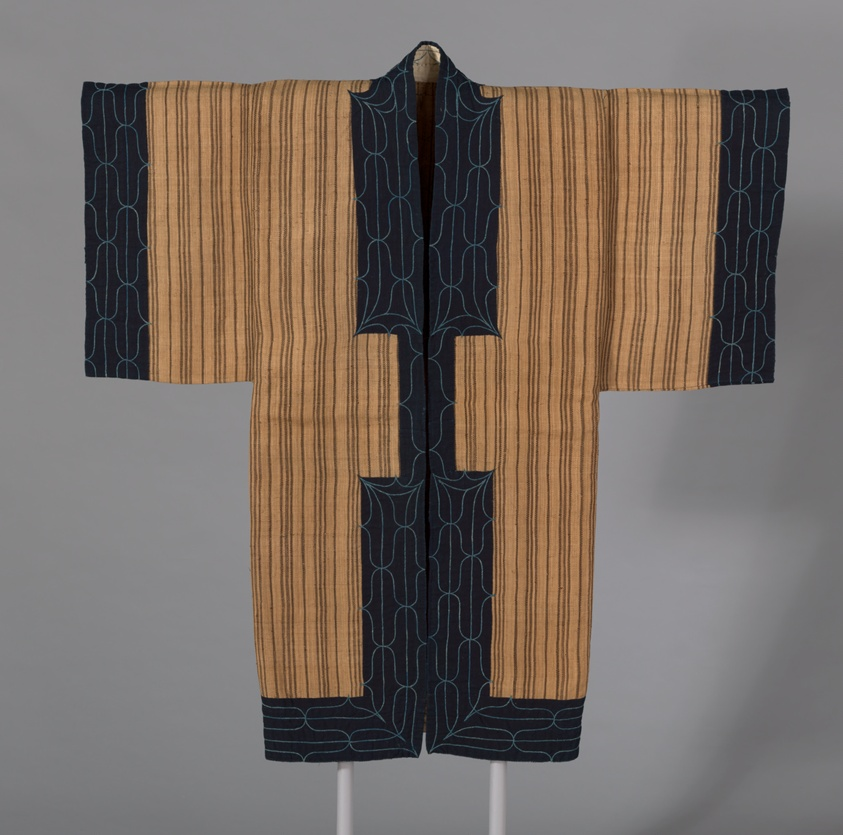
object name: Textile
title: "Attus" Amip (Man's Coat)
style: ainu, Japanism, East Asian, asian, late edo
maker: Ainu (Japan, Hokkaido Island)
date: c. 1860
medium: Elm tree bark fiber, plain weave; center back and outer edges appliquéd with cotton, plain weave; underlaid with cotton, plain weave; embroidered with cotton in laid work and couching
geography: Japan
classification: textile; costume; costume - embroidery; costume - weaving; embroidery; weaving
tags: geometric motif